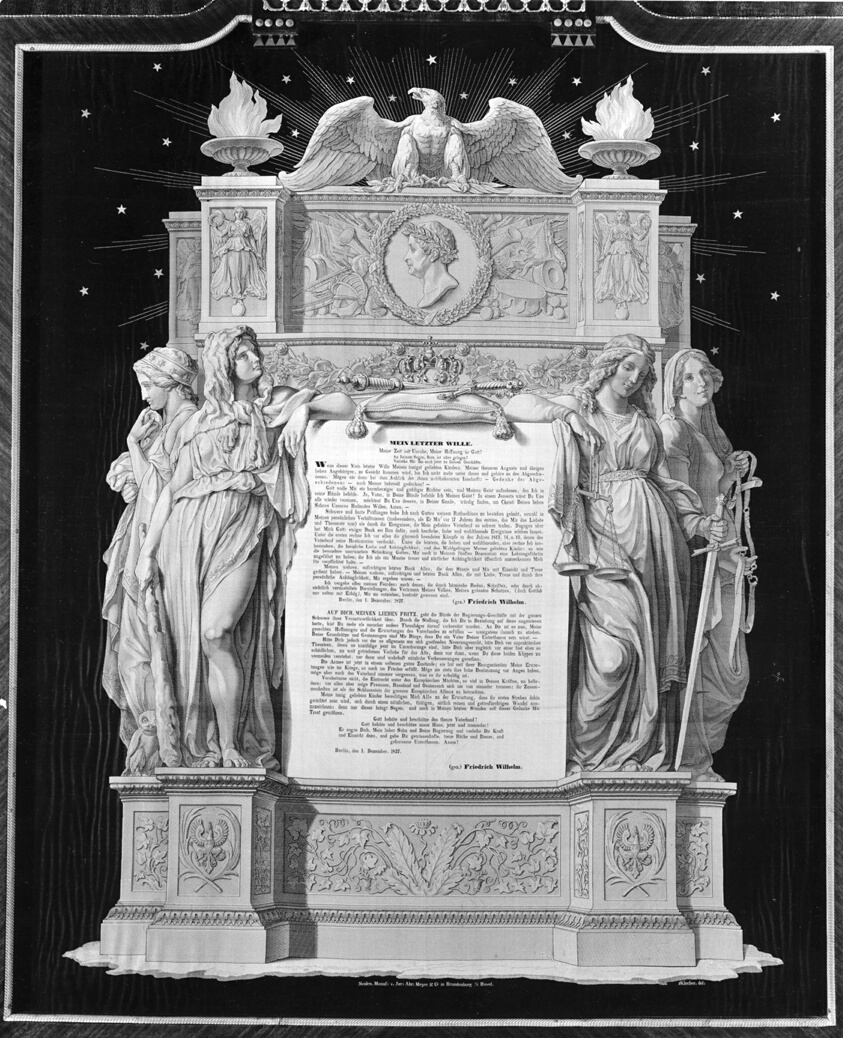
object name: Textile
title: Picture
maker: Germany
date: after 1827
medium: Silk, plain weave with supplementary binding warps tying supplementary patterning and supplementary backing wefts; woven on loom with Jacquard attachment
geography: Germany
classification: textile; weaving